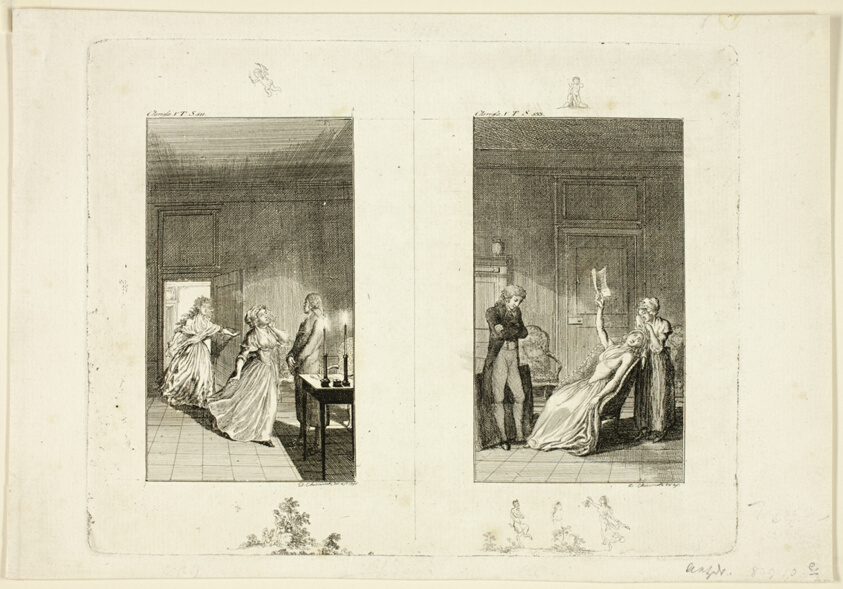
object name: Print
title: Illustration to Samuel Richardson's Clarissa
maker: Daniel Nikolaus Chodowiecki (German, 1726-1801)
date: 1796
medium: Etching on paper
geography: Germany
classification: etching; print; prints and drawing